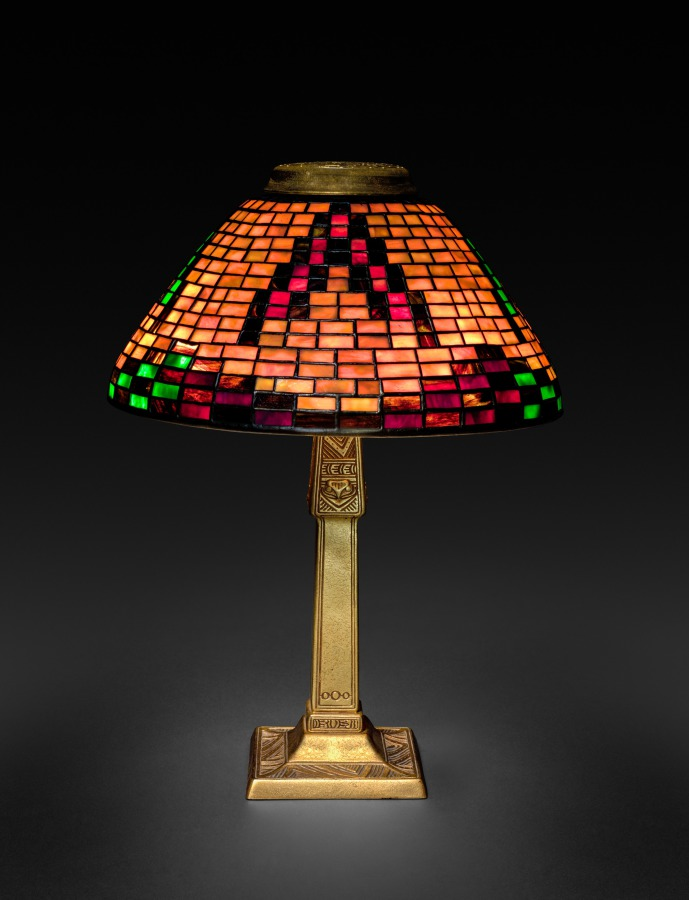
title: Indian Basket Lamp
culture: America, New York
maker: Tiffany Studios (United States, New York, 1902–32)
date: c. 1902–10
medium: Leaded glass, gilt bronze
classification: Lamp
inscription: inside bottom rim of shade: Tiffany Studios New York 1586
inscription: stamped on underside of base: Tiffany Studios/New York/536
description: An admirer of Native American art, Louis Comfort Tiffany amassed a personal collection of textiles, baskets, and pottery, from which he and his designers drew inspiration. He was particularly interested in the way basket weavers formed their patterns using geometric grids, a look he re-created in designs for lamps, such as the Indian Basket lamp.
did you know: This lamp features dichroic glass, which appears green in reflected light but glows amber when illuminated.